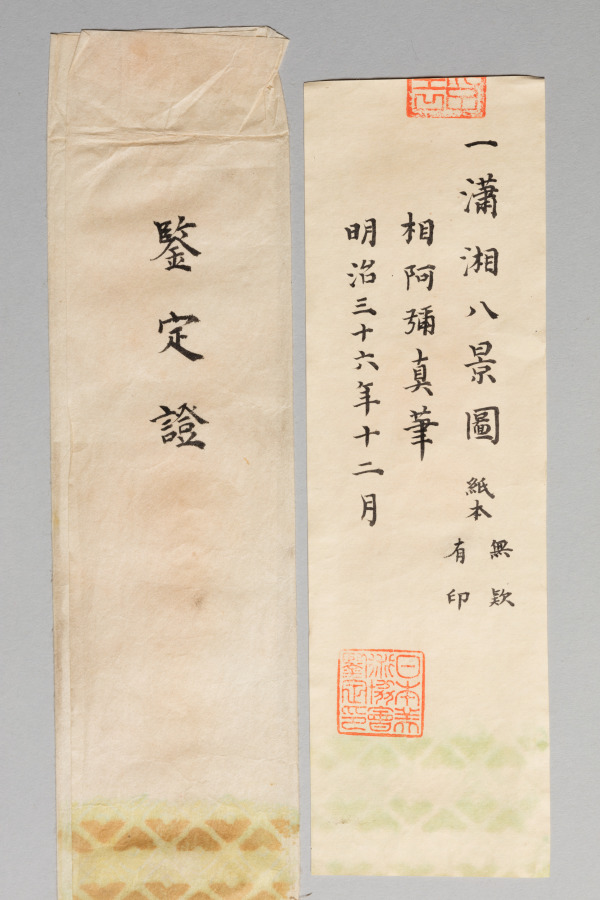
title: Landscape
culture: Japan, Edo period (1615–1868)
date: early 1600s to mid-1800s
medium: hanging scroll; ink on paper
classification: Painting